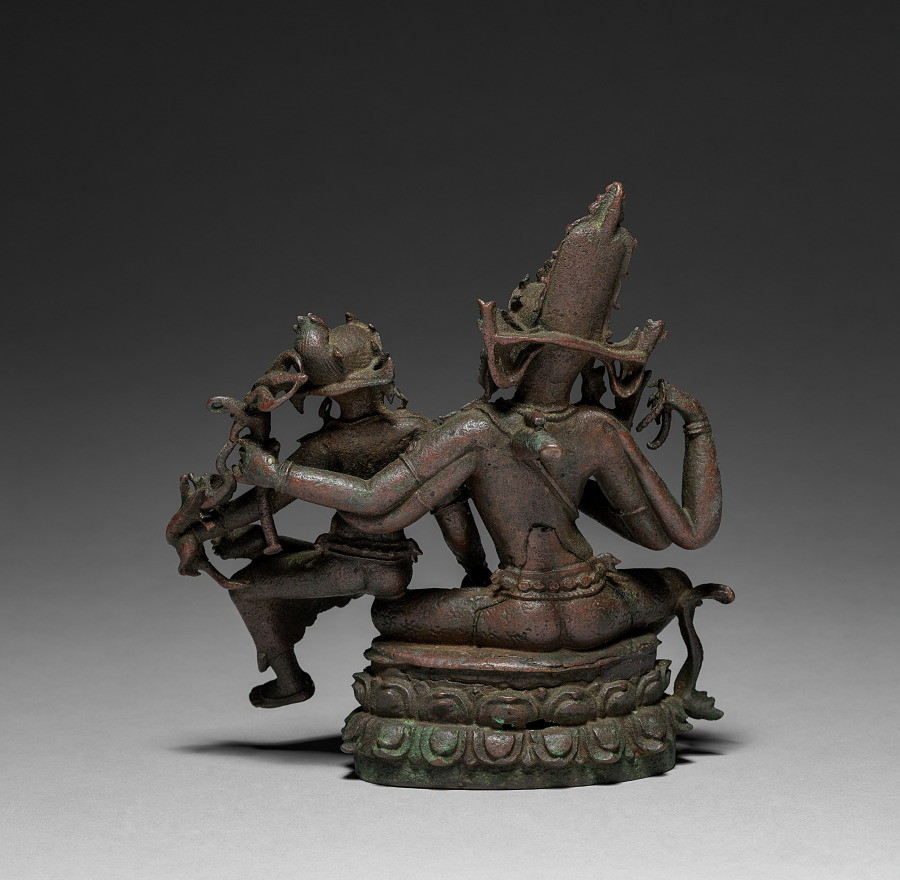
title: Shiva and Parvati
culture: East India, Bengal, Pala period, 9th Century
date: 800s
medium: bronze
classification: Sculpture